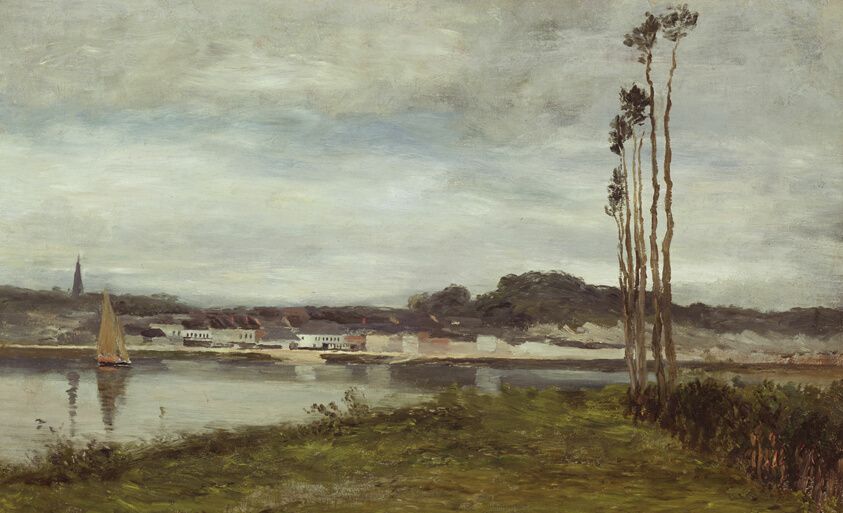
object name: Painting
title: On the Seine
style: Impressionism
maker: Homer Dodge Martin (American, 1836–1897)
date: c. 1895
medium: Oil on canvas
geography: United States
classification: painting; american arts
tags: landscapes